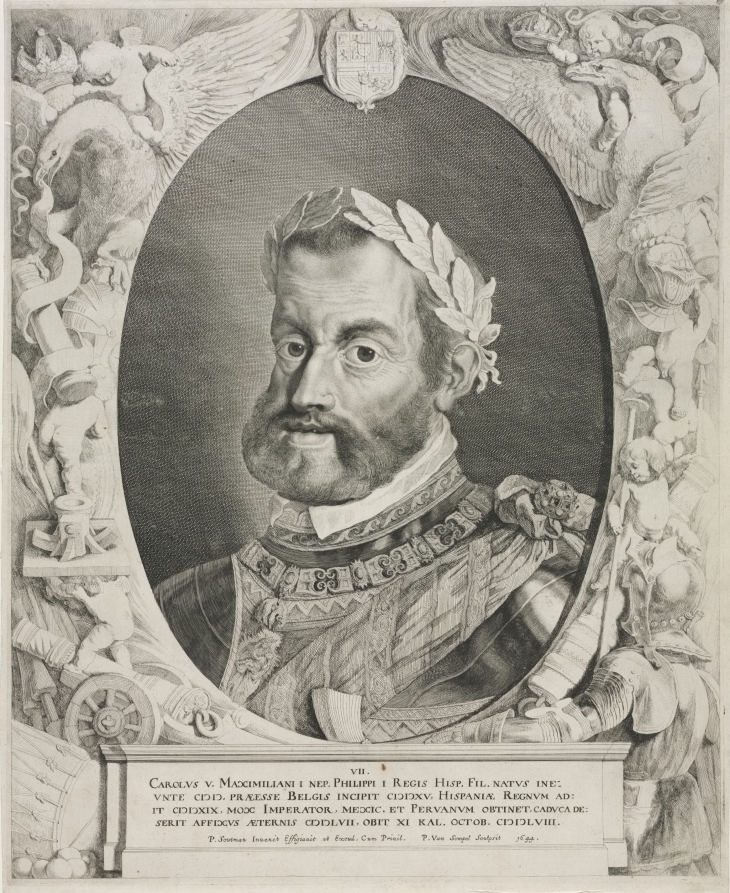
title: Portrait of Emperor Charles V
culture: Flanders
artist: Pieter van Sompel (Flemish, c. 1600–after 1644)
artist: after Pieter Claesz. Soutman (Dutch, 1657)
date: 1644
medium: engraving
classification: Print